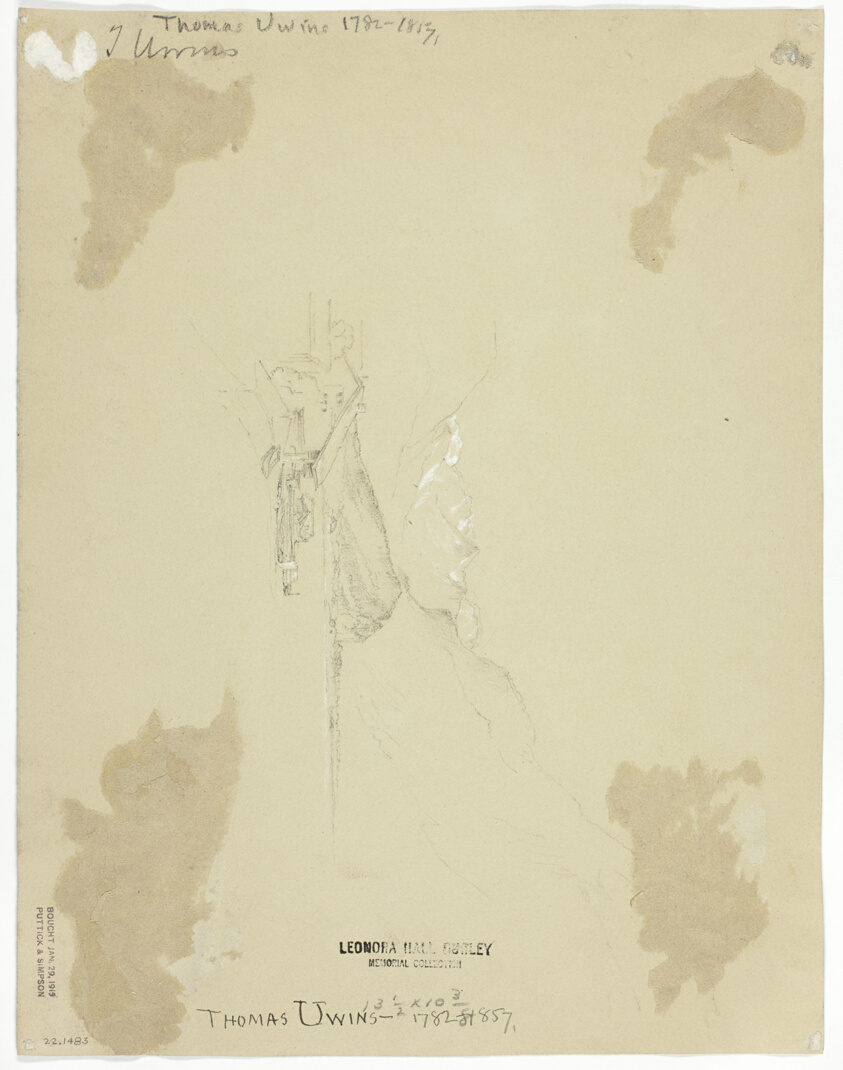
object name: Drawing and Watercolor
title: Nude Man Kneeling, Holding Staff (recto); Alpine Panorama (verso)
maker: Thomas Uwins (English, 1782-1857)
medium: Black chalk, heightened with white chalk (recto and verso), on gray-brown wove paper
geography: England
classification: chalk; paper; drawings (visual works); prints and drawing